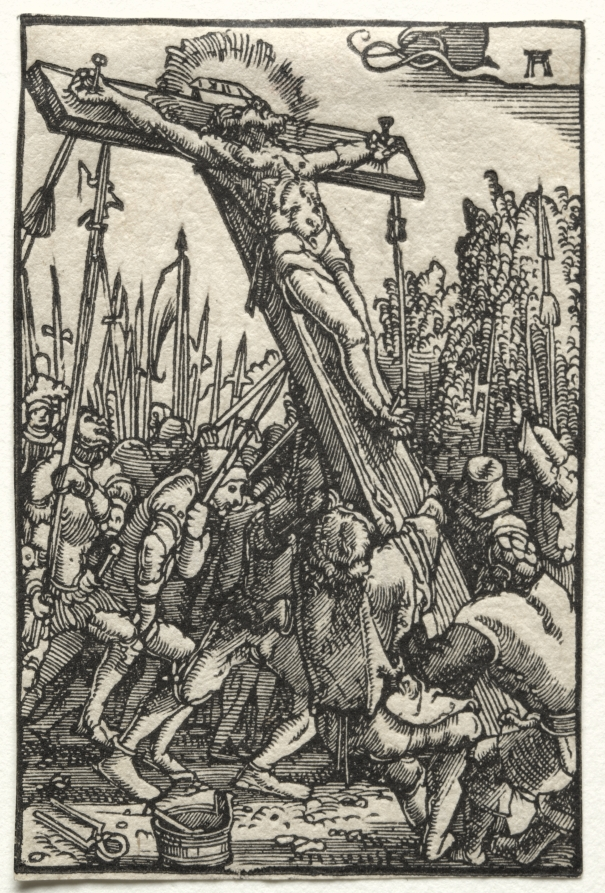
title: The Fall and Redemption of Man: The Raising of the Cross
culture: Germany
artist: Albrecht Altdorfer (German, c. 1480–1538)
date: c. 1515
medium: woodcut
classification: Print